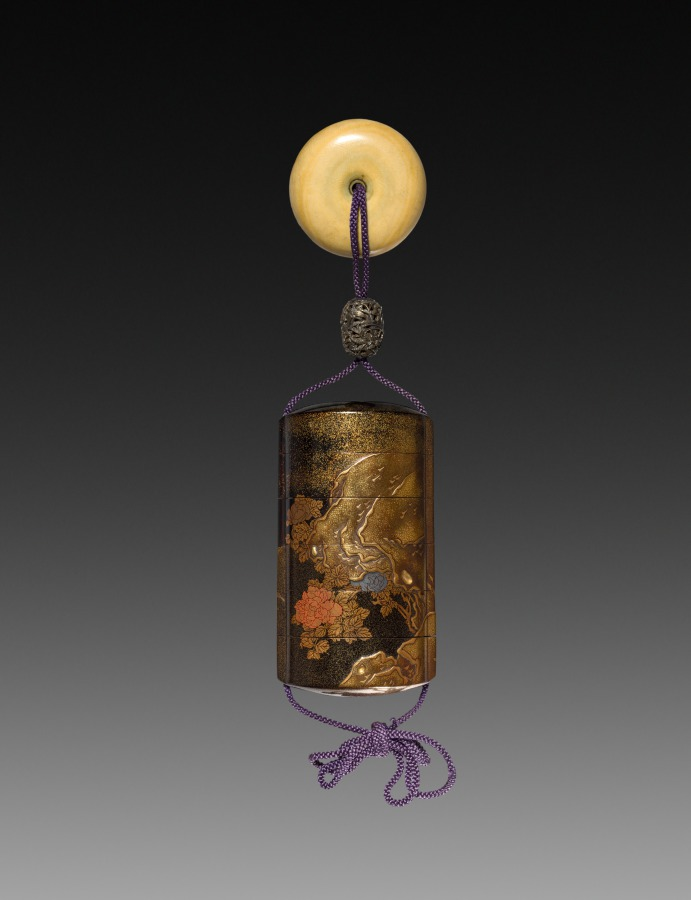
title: Inro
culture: Japan, Edo period (1615–1868)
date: early 1800s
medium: lacquer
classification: Lacquer